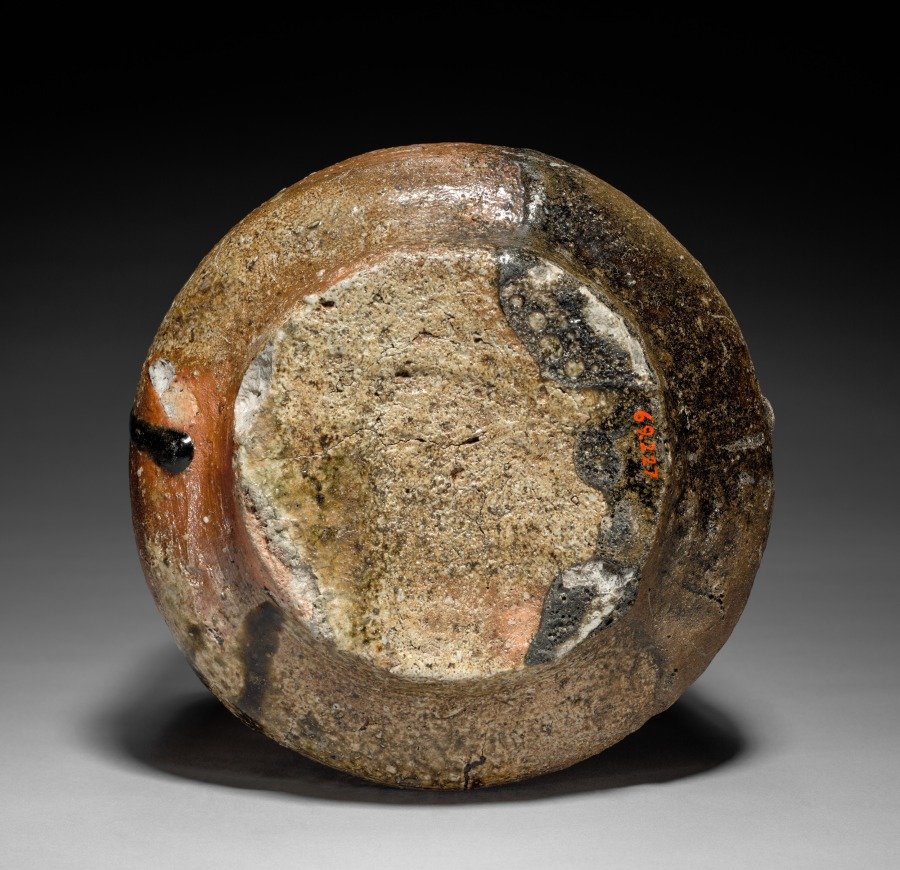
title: Tea Storage Jar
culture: Japan, Momoyama period (1573–1615)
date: 1573–1615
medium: glazed stoneware (Shigaraki ware)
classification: Ceramic